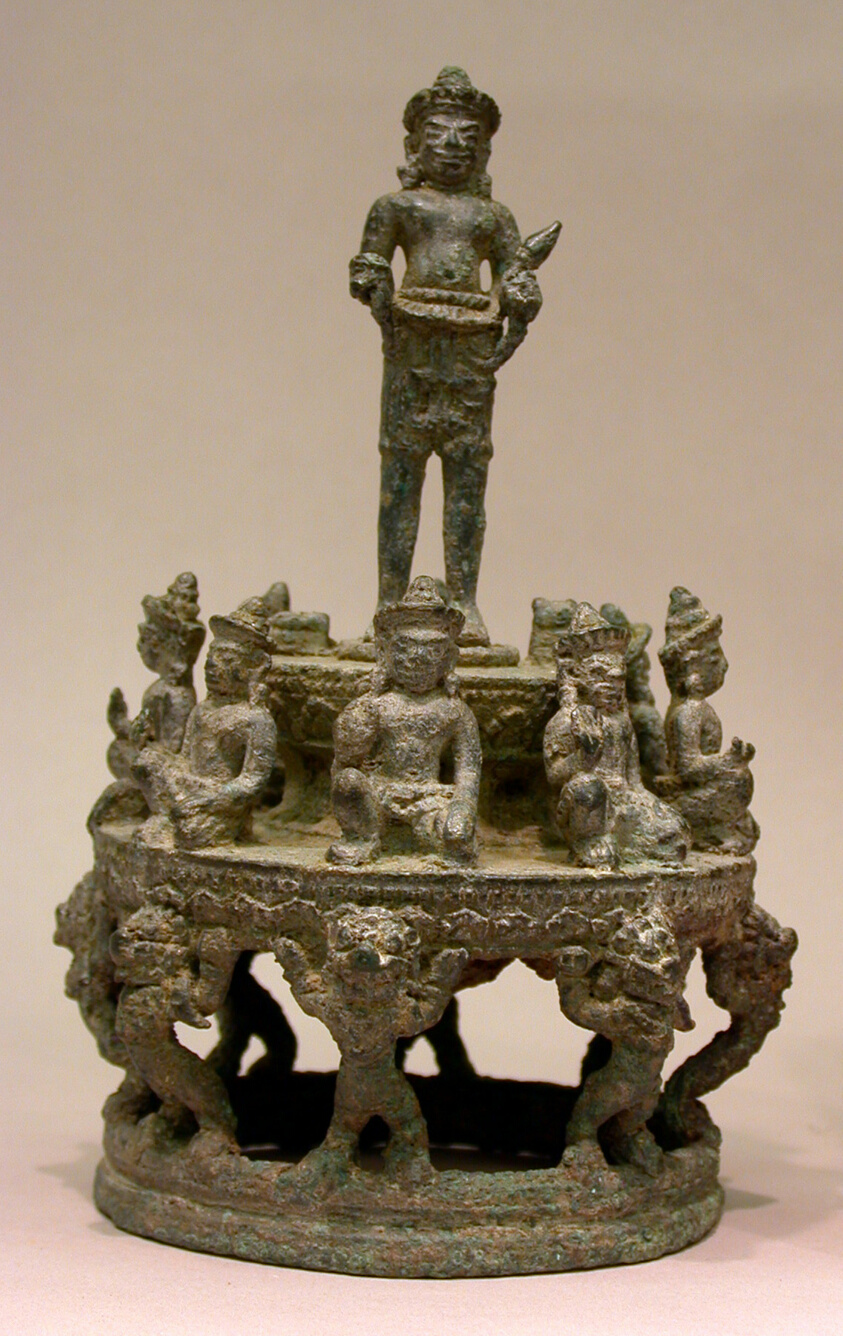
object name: Sculpture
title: Mandala of Surya, the Sun God, and Lesser Planetary Deities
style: Southeast Asian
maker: Cambodia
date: Angkor period, 12th century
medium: Bronze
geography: Cambodia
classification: bronze; sculpture